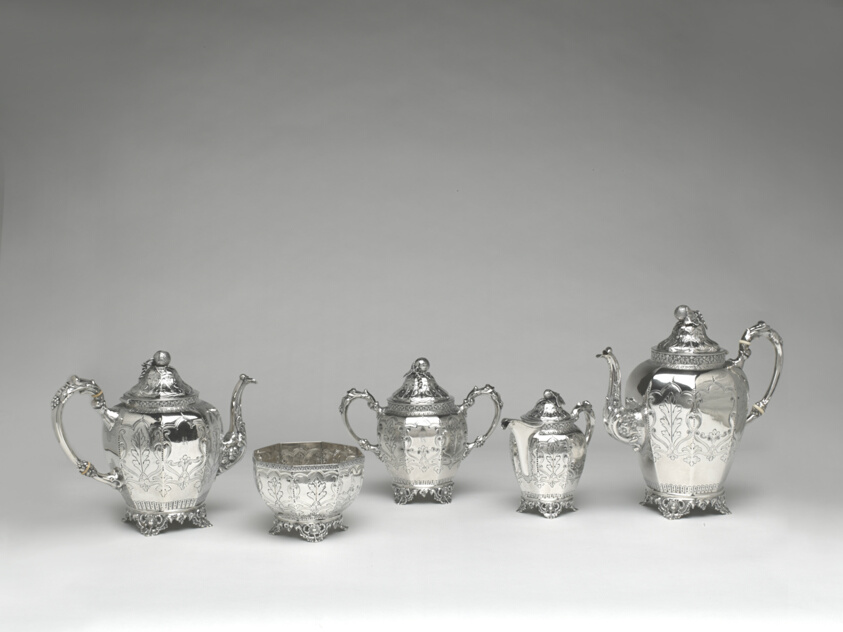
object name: Metalwork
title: Sugar Bowl (part of a set)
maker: J.T. and E.M. Edwards; American, 1852–1864; Chicago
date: 1852–64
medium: Silver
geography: Chicago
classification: sugar bowl; silver; american decorative arts; american arts; decorative arts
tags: Chicago